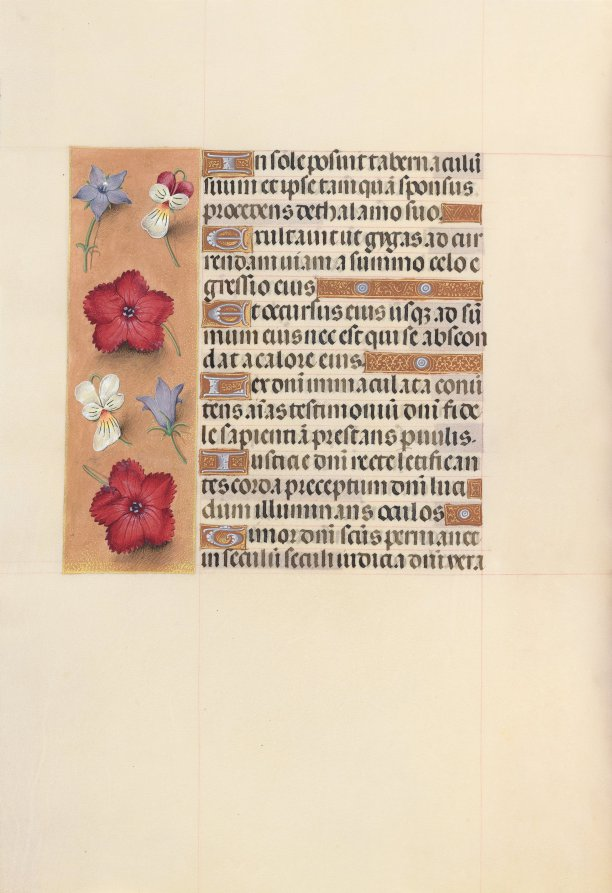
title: Hours of Queen Isabella the Catholic, Queen of Spain: Fol. 101v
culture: Flanders, Ghent and Bruges, late 15th century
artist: Master of the First Prayerbook of Maximillian (Flemish, c. 1444–1519)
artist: and Associates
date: c. 1500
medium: ink, tempera, and gold on vellum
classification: Bound Volume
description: This manuscript was illuminated by a circle of at least five highly organized manuscript painters active in the Flemish cities of Ghent and Bruges. The principal illuminator was Alexander Bening, who painted the majority of the book's miniatures. Manuscripts produced by this circle of artists are renowned for the decoration of their borders, which typically feature a rich variety of realistically-painted flowers, birds, and butterflies. This prayer book, called a book of hours, was intended not for a cleric, but for the private devotions of a lay person-in this case, Isabella the Catholic, Queen of Spain (1451-1504). Isabella's coat of arms embellishes the book's frontispiece. It is unlikely that the book was commissioned by the Queen herself; rather, she probably received it as a diplomatic gift from someone courting her patronage, perhaps Cardinal Francisco Jimenez de Cisneros. A Franciscan friar, Jimenez was dependent upon Isabella for his advancement, first to the post of Queen's confessor in 1492, and then to Archbishop of Toledo in 1495.